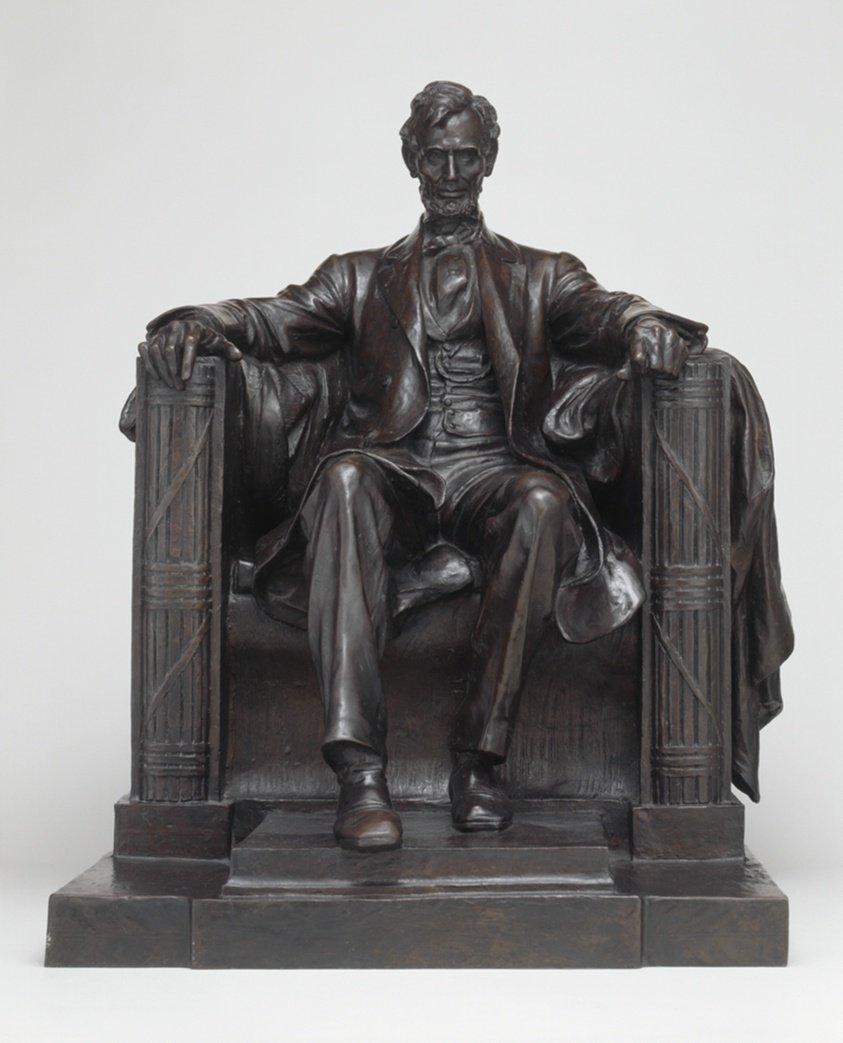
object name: Sculpture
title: Abraham Lincoln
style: Realism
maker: Daniel Chester French (American, 1850–1931)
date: Modeled 1916, cast after 1916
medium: Bronze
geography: United States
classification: sculpture; american arts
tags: people, portraits